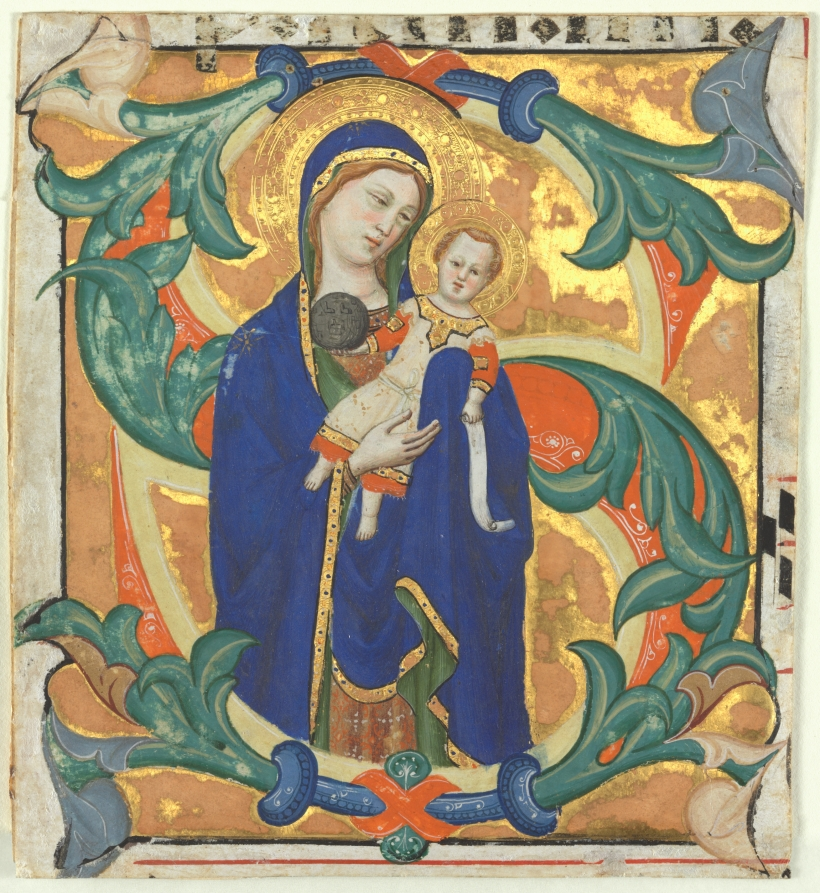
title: Initial S[alve sancta parens] from a Gradual: Madonna and Child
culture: Italy, Florence, 14th century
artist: Don Silvestro dei Gherarducci (Italian, 1339–1399)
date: c. 1370–1374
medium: ink, tempera, and gold on vellum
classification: Manuscript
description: Along with several other excised leaves and miniatures that survive in various libraries and museums, this decorated initial S was part of a magnificent gradual produced in the scriptorium of the monastery of Santa Maria degli Angeli in Florence. The Madonna and Child was a standard image for the Saturday votive Mass to the Virgin. This initial originally introduced the text: Salve sancta parens (“Hail, Holy Mother”).